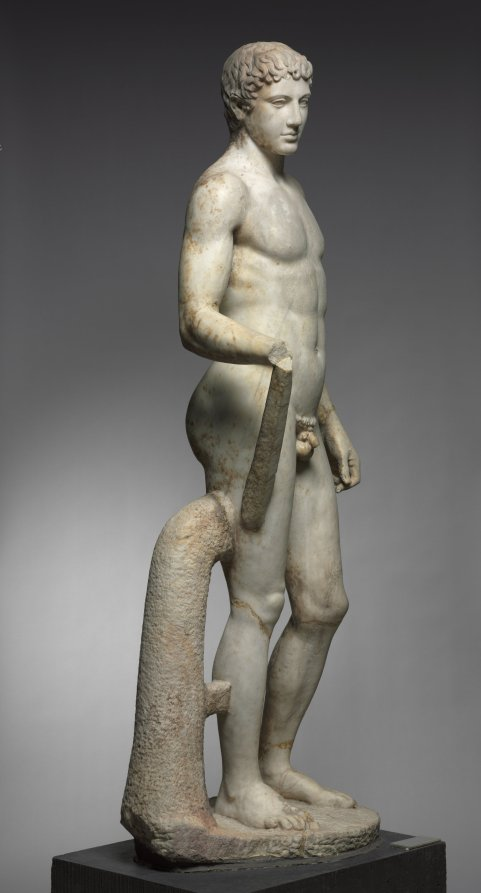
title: Statue of an Athlete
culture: Italy, Roman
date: 1–100 CE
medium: marble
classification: Sculpture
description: This idealized athlete recalls Greek sculptural types invented and popularized during the 400s BC. Large-scale athletes and other sculptures like this were originally created by famous artists as sanctuary dedications. Centuries later, they were widely copied and adapted by Roman sculptors, whose clients sought their own versions of earlier masterpieces. Working in marble rather than bronze, these sculptors added certain elements for stability, such as the struts and the large tree trunk beside the right leg here. Sculptures like this one are profoundly complex, made by and for Romans but descended from Greek ancestors.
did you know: For many years, this sculpture stood in the rotunda of the Cleveland Museum of Art.